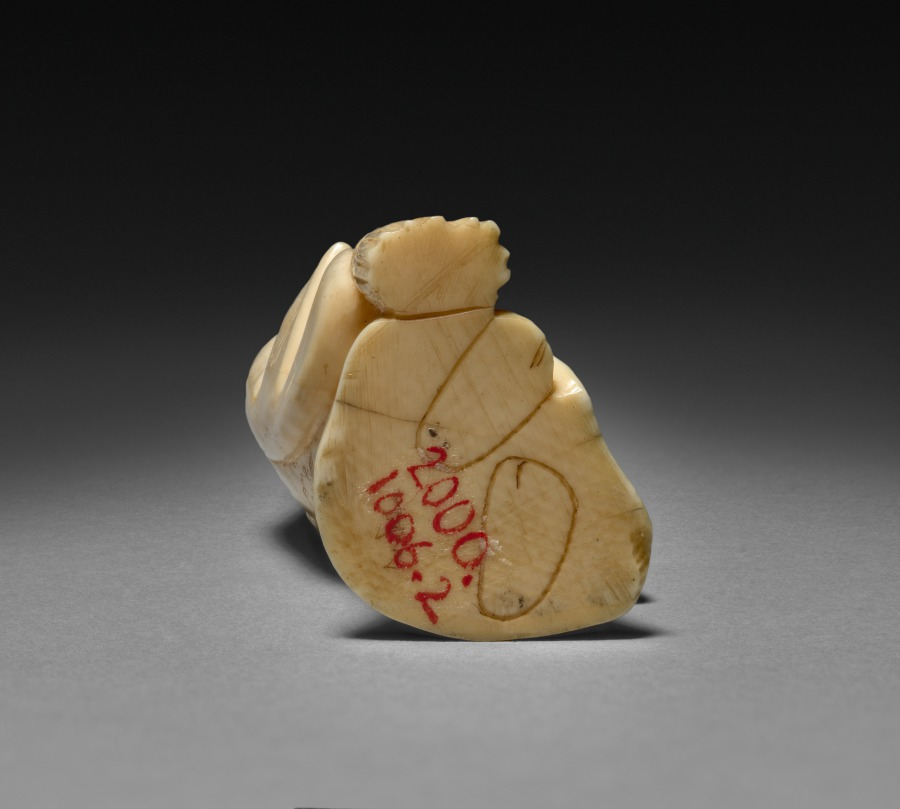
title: Woman with Broom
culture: Japan, Meiji period (1868–1912)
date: early 1900s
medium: ivory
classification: Ivory